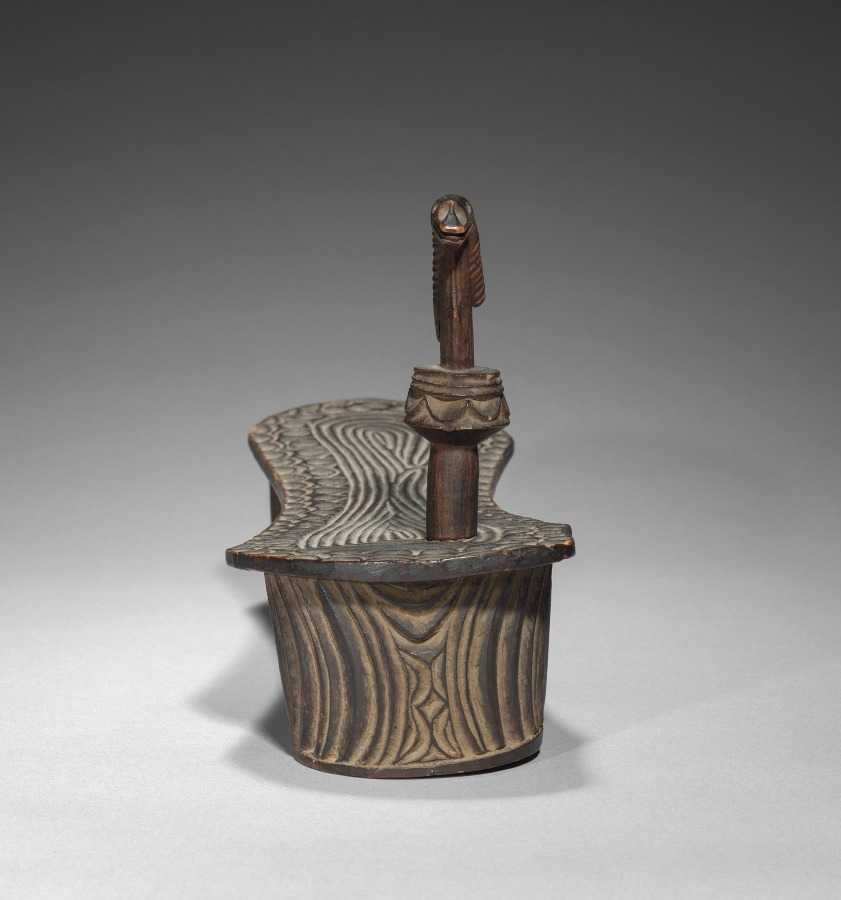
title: Sandal (mtalawanda / mtawanda) or Clog (kiatu cha mti)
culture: Africa, Central Africa, Democratic Republic of Congo, unidentified carver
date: c 1800s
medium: Wood and glass beads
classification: Wood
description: Common in the Indian Ocean region, wooden sandals changed meaning across place and time. This pair’s base elevates the foot as the toes grip an antelope-shaped peg (msuruaki). Crisp geometric sole designs suggest they were rarely worn. East African elites and merchants once had exclusive rights to wooden shoes, wearing elaborate ones only for portraits. Formerly enslaved people living along the coast wore simpler ones from the 1840s onward, adopting elite footwear to assert their liberation. However, slave traders like the Zanzibari “Tippu Tip” (c. 1832–1905) likely brought mitalawanda to Central Africa; stylistic elements of this pair hail from that region.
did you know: This distinctive footwear traveled from Southeast Asia and the Middle East to Africa, first to the Swahili Coast and then further inland to parts of Central Africa. The deity Krishna wears similar shoes (paduka) in an eighteenth-century Indian miniature painting (2003.344).